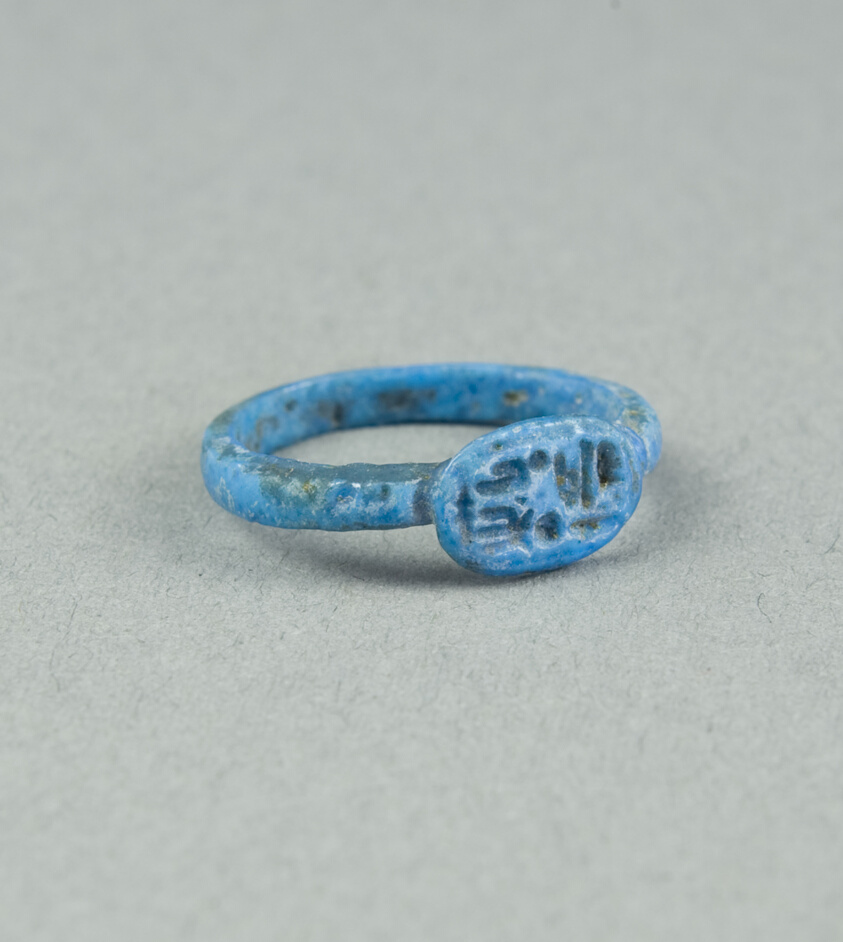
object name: Costume and Accessories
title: Ring: Ramesses (II), Beloved of Amun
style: nineteenth dynasty, new kingdom, egyptian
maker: Egyptian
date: New Kingdom, Dynasty 19, reign of Ramesses II (about 1279–1213 BCE)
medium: Faience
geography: Egypt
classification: ring (jewelry); ceramics; jewelry; ancient art; costume; faïence (composite material)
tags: pharaohs